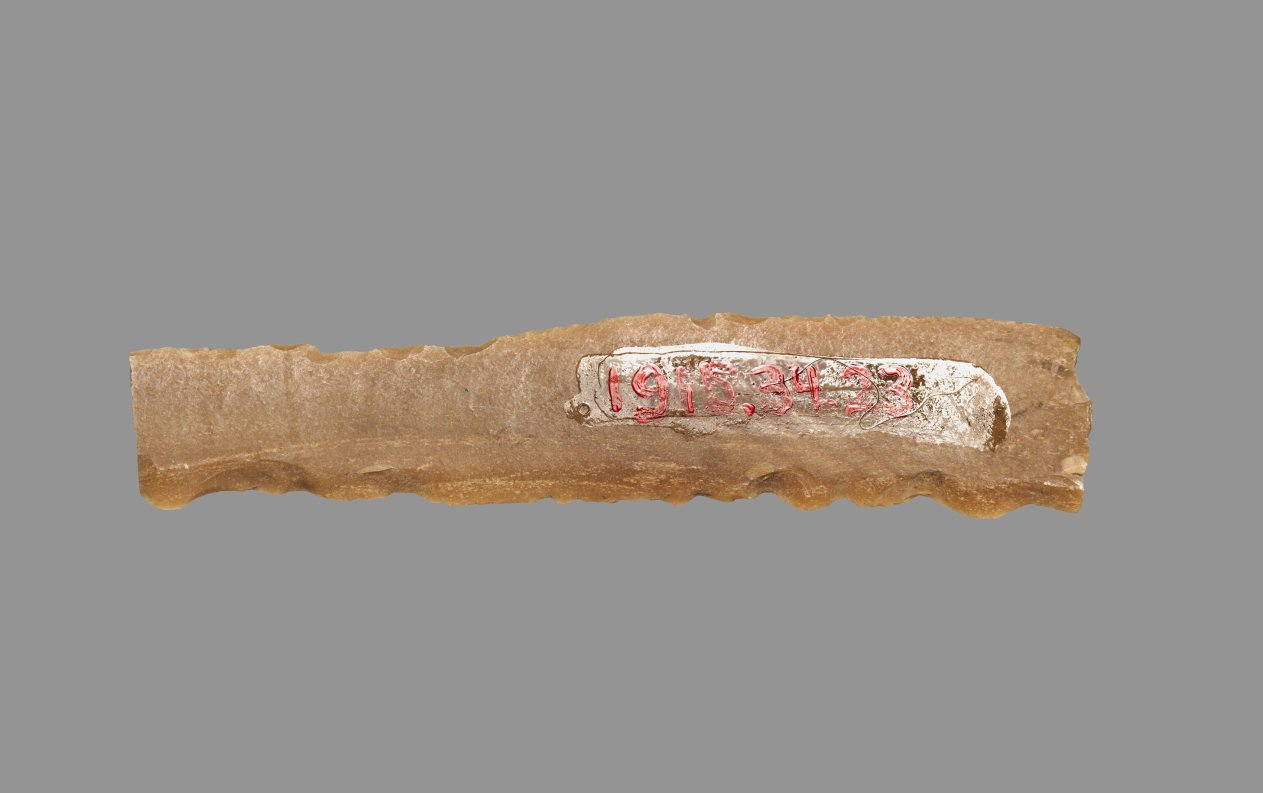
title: Sickle Blade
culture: Egypt, Middle Kingdom (2040–1648 BCE), Dynasty 12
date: 1980–1801 BCE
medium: flint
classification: Implements